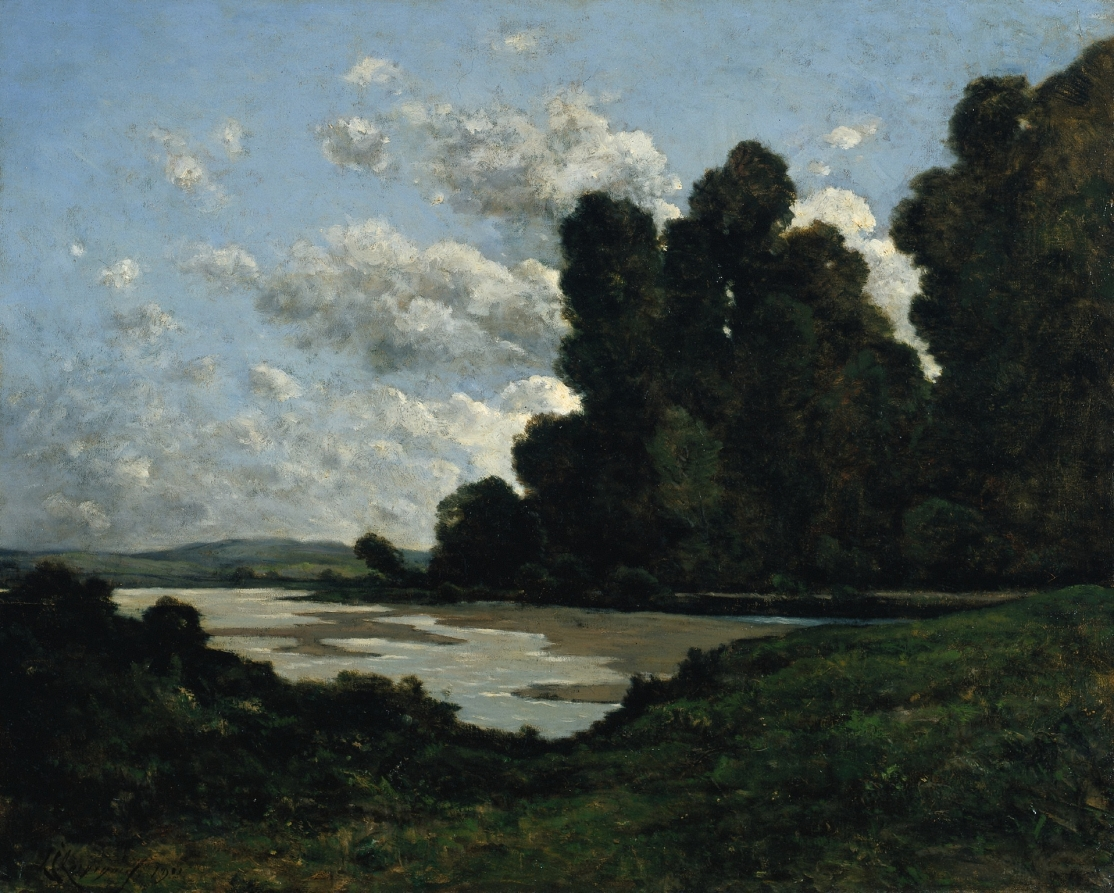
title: The River Loire at Nevers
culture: France, 19th century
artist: Henri Joseph Harpignies (French, 1819–1916)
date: 1901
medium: oil on fabric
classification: Painting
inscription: Signed lower left: h.j harpignies. 1901